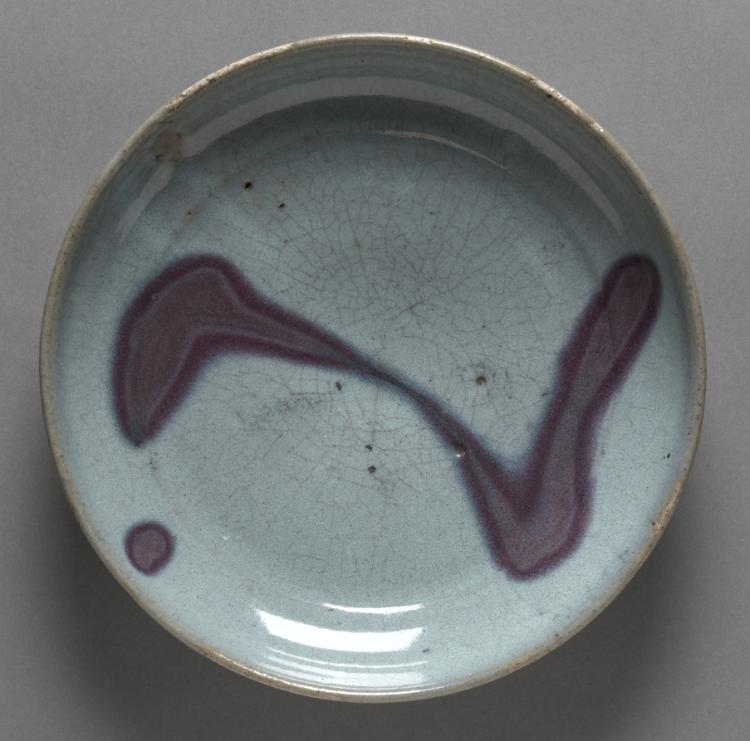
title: Plate: Jun Ware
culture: Northern China, Yuan dynasty (1271-1368)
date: 1279–1368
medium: Stoneware with mottled glaze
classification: Ceramic